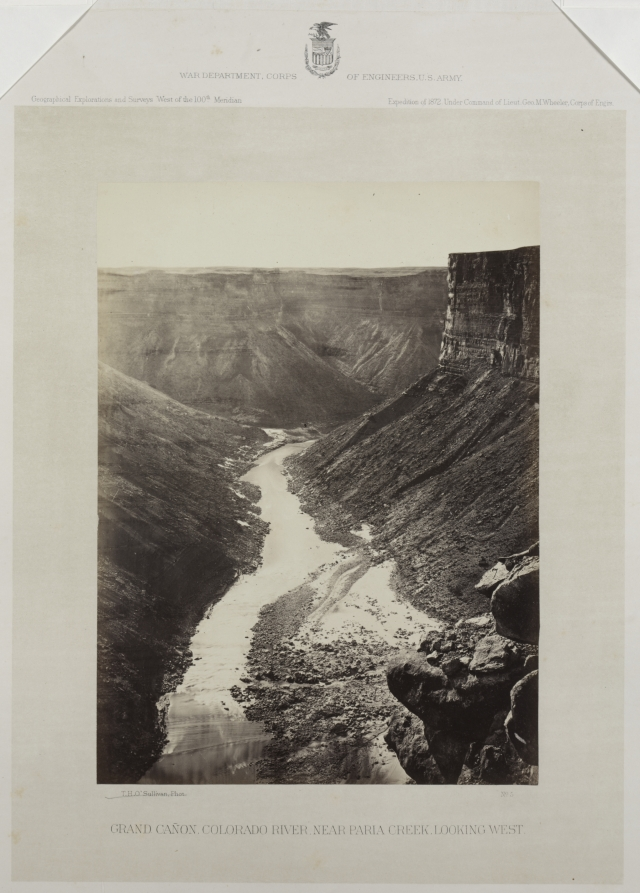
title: Grand Cañon, Colorado River, Mouth of Kanab Wash, Looking West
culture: America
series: Geographical Explorations and Surveys West of the 100th Meridian Expedition of 1872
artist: William H. Bell (American, 1830–1910)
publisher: U. S. Army Corps of Engineers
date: 1872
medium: albumen print from tannin dry plate negative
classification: Photograph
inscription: Scratched into negative: "7"; [unidentifiable mark]; written in pencil on recto: "Photo by W. BELL"; printed in ink on recto: "WAR DEPARTMENT, CORPS [Great Seal of the U.S.] OF ENGINEERS, U.S. ARMY./Geographical Explorations and Surveys West of the 100th Meridian Expedition of 1872. Under Command of Lieut. Geo. M. Wheeler, Corps of Eng'rs. / T. H. O'Sullivan, Phot. [crossed out in pencil] No. 5 / GRAND CAÑON, COLORADO RIVER, NEAR PARIA CREEK, LOOKING WEST." [Note: photo attached to wrong mount]